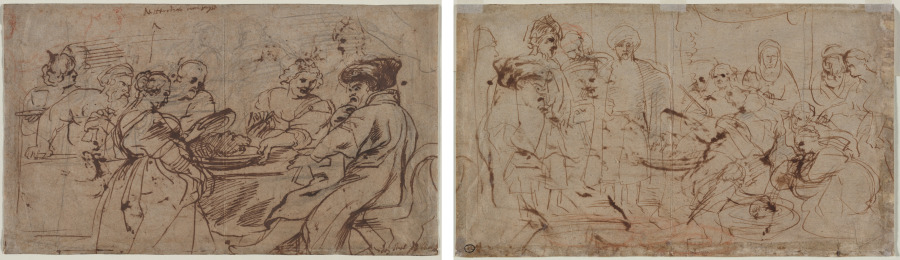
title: The Feast of Herod (recto); Tomyris with the Head of Cyrus (verso)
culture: Flanders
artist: Peter Paul Rubens (Flemish, 1577–1640)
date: c. 1637–38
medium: pen and brown ink, with black and red chalk, touched with white gouache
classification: Drawing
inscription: by artist, upper center, in brown ink: de Herodias [wat hooger? (or: "meden hoofte," "wat hoegte," or "wat hogher")]; by artist, lower right, in brown ink: den[or: deze] stoel te [cort?].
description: Peter Paul Rubens had a large studio in Antwerp and used drawing to prepare for large paintings as well as to direct the many pupils who assisted him. Striking in its immediacy, the drawing on the recto of this sheet of paper is a preparatory study for the Feast of Herod painting now at the Scottish National Gallery in Edinburgh. Herod, wearing a large cap and wrapped in a mantle, shrinks back in horror as Salome uncovers a charger that holds the head of Saint John the Baptist. Smiling, Herodias grabs the platter with her left hand and, in a chilling detail, gestures toward the charger with a fork. Rubens wrote what is usually interpreted as “Herodias somewhat higher” at the top of the sheet. The verso of the sheet depicts a sketch for another story featuring a change of fortune at the hands of a vengeful woman, Tomyris with the Head of Cyrus. Rubens made two paintings of the subject (now in Paris and Boston). A rare theme, the story tells of Queen Tomyris who, avenging the death of her son in battle, collects the head of his murderer Cyrus in a bag of human blood. Tomyris is shown seated under a canopy holding a scepter, while the servants before her handle Cyrus’s head. Rubens wrote “plus spatij” (more space) in the center of the sheet.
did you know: The two stories that Rubens depicted on the front and back of this sheet of paper each feature a gruesome death, the result of revenge at the hands of a powerful woman.